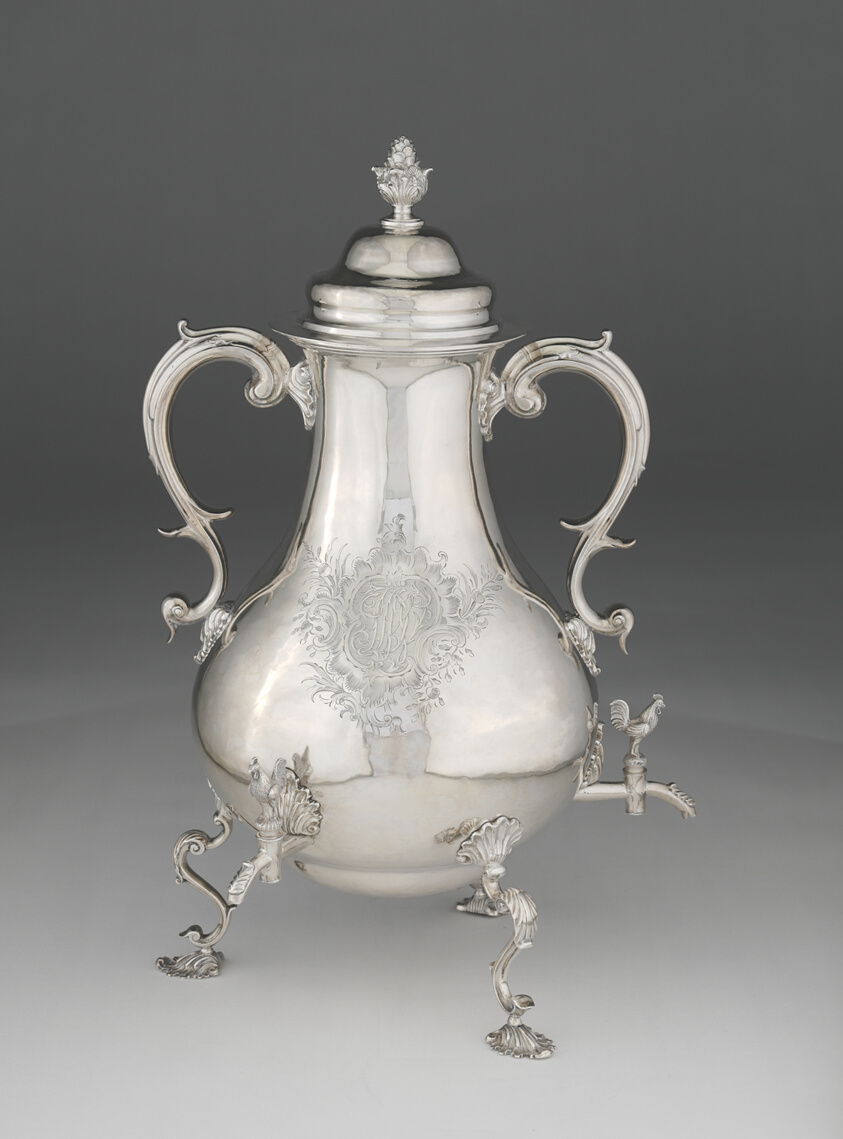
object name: Metalwork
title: Urn with Cover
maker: Ephraim Brasher; American, 1744–1810; New York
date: c. 1770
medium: Silver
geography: New York City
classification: vessel for serving drinks; silver; american decorative arts; american arts; decorative arts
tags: dining, drinking